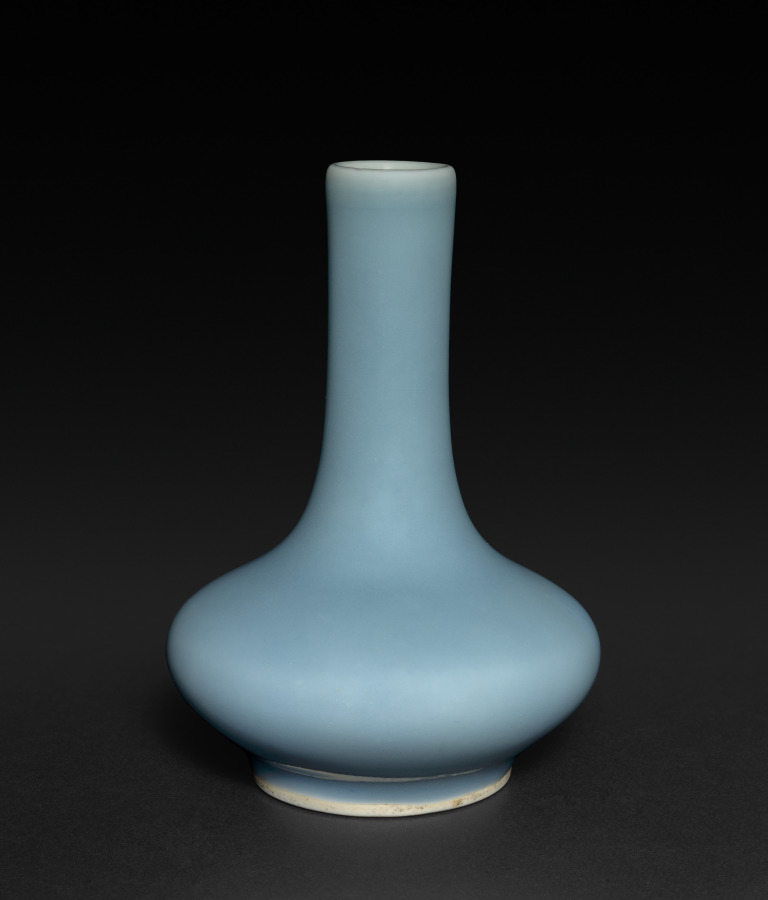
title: Bottle-Shaped Vase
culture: China, Qing dynasty (1644-1911), Kangxi reign (1661-1722)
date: 1661–1722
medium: porcelain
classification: Ceramic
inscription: 大清康熙年製